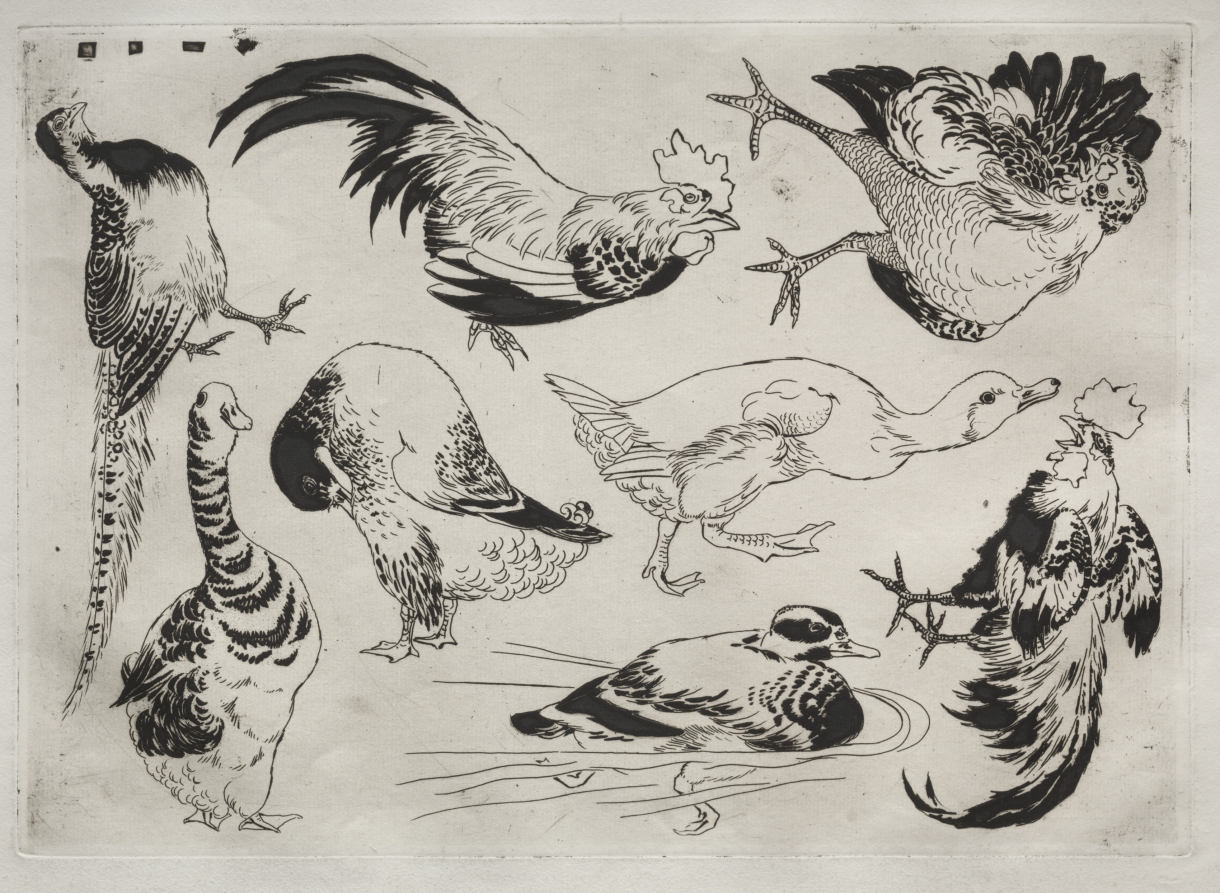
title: Dinner Service (Rousseau service): Roosters, ducks, etc. (no. 13)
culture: France, 19th century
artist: Félix Bracquemond (French, 1833–1914)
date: 1866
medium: etching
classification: Print